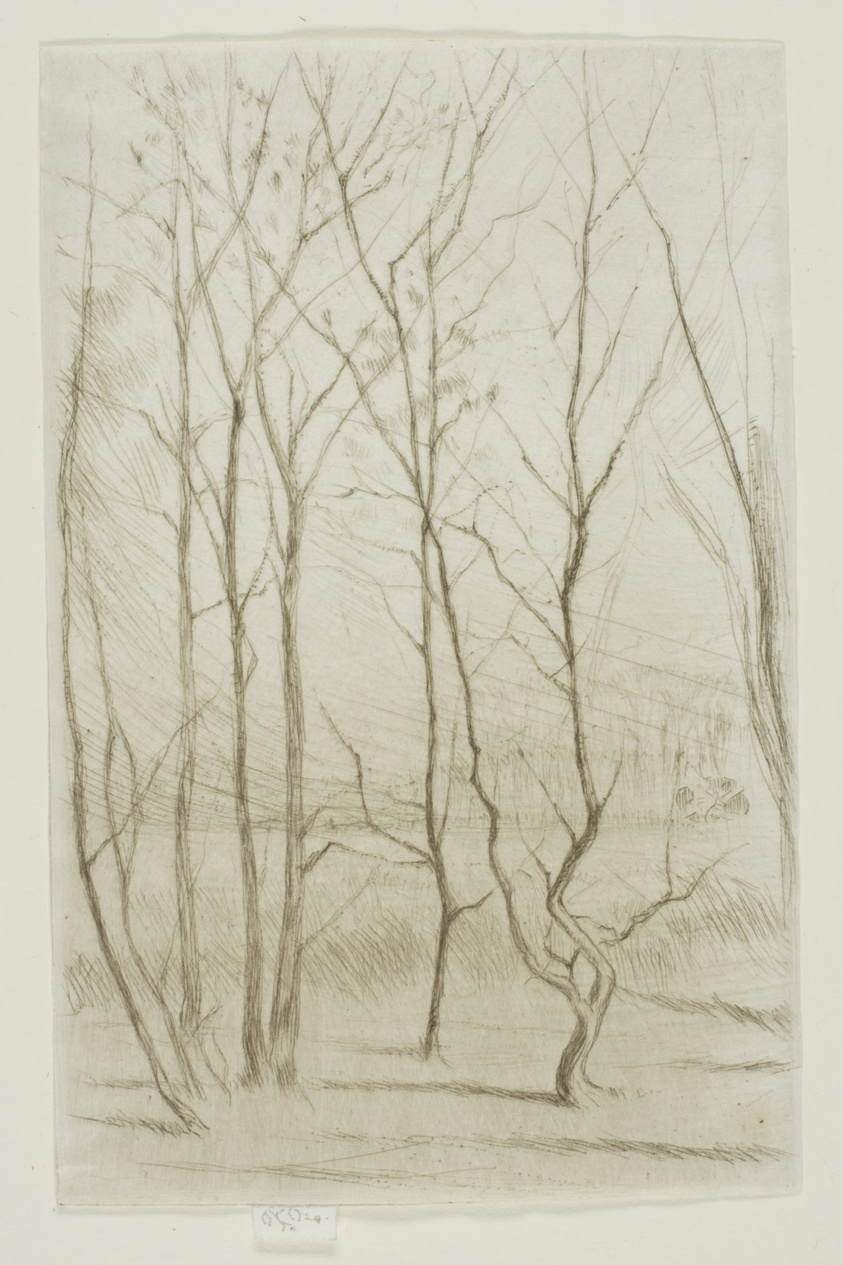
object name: Print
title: The Dam Wood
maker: James McNeill Whistler (American, 1834-1903)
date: 1874/75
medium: Drypoint in brown ink on off-white wove paper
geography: United States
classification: drypoint; print; prints and drawing; paper